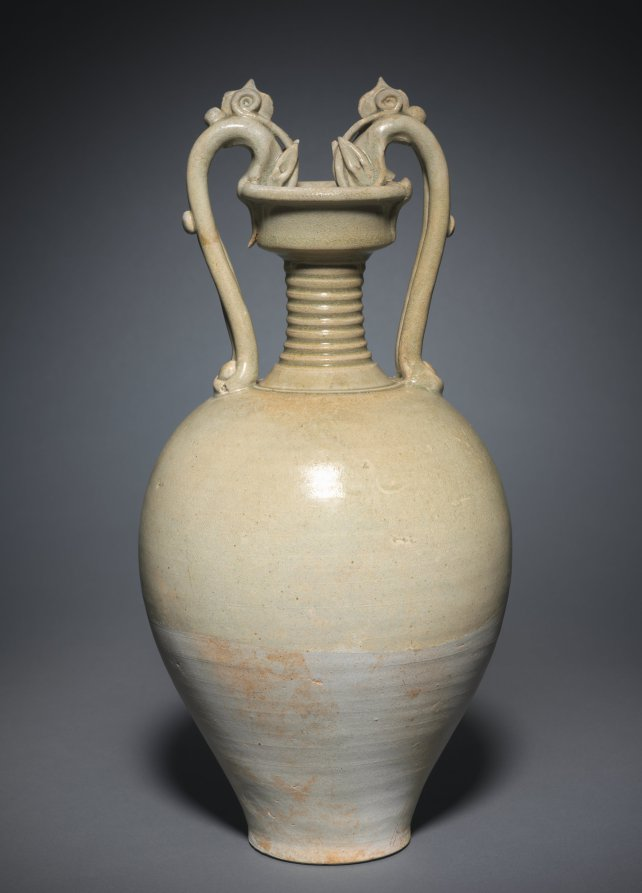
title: Jar (Amphora) with Dragon Handles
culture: China, Sui dynasty (581-618) to early Tang dynasty (618-907)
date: 600s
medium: glazed stoneware with modeled and applied decoration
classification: Ceramic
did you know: The two handles were formed by double coils of clay, which turn into dragon heads biting the vessel's rim.